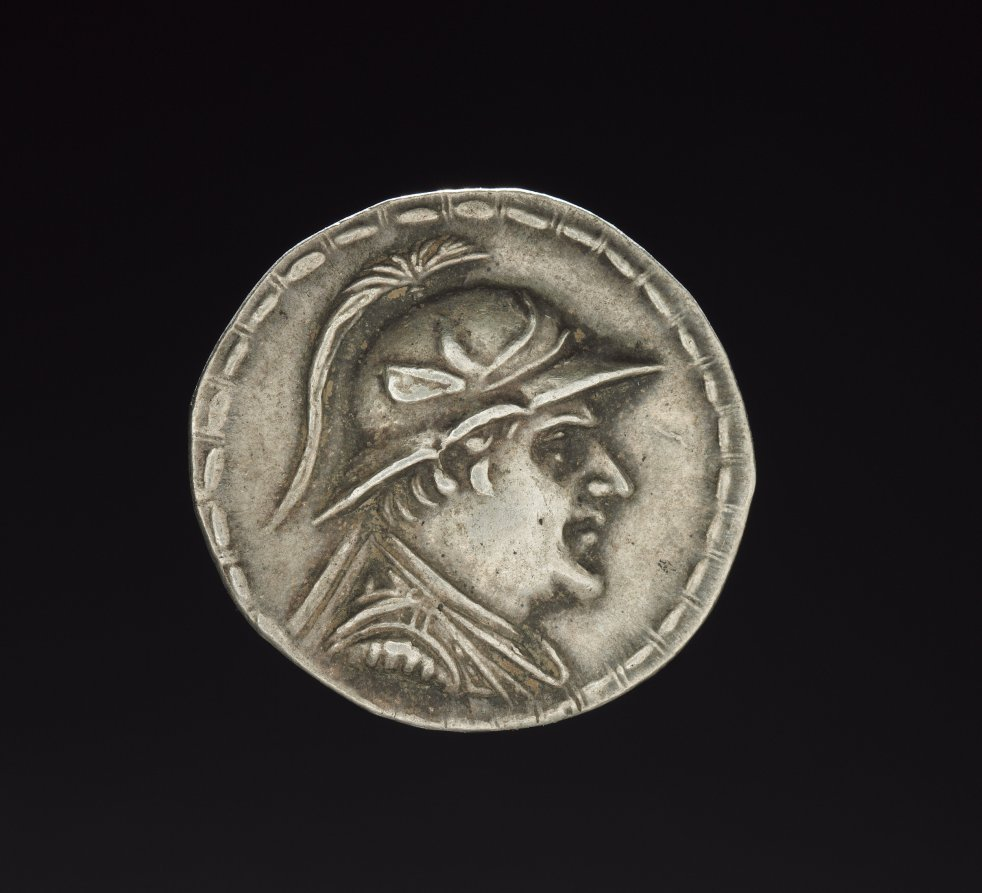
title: Coin of Eukratides I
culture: Afghanistan, Bactria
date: 170–145 BCE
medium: silver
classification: Silver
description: Eukratides, a successor of Alexander in Bactria, wears a helmet with bull's ear and horn, like military leaders from Macedon, Alexander's homeland in the north of Greece. On the reverse Castor and Pollux, sons of Zeus, ride horseback. Because Alexander also was considered to be an offspring of Zeus, Eukratides referenced his link to Alexander by including Castor and Pollux on his coin.